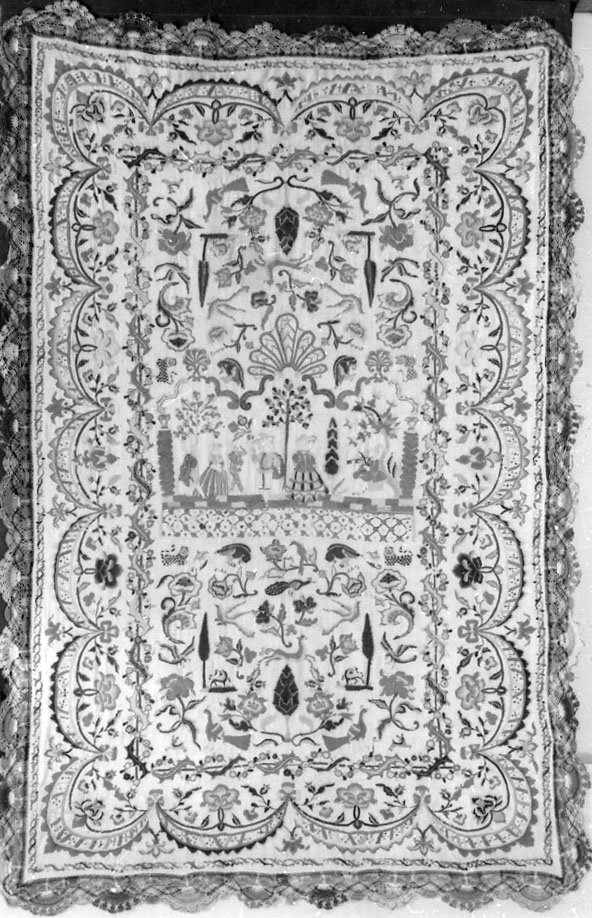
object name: Textile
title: Bedcover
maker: Spanish or Portugal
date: 1750/1800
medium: Cotton, twill weave; embroidered with wool (crewel) in satin, link powdering and stem stitches; also embroidered with silk and metal strips wound around a silk fiber core in split and stem stitches; couching; bobbin lace border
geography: Spain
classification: textile; needlework (visual works)